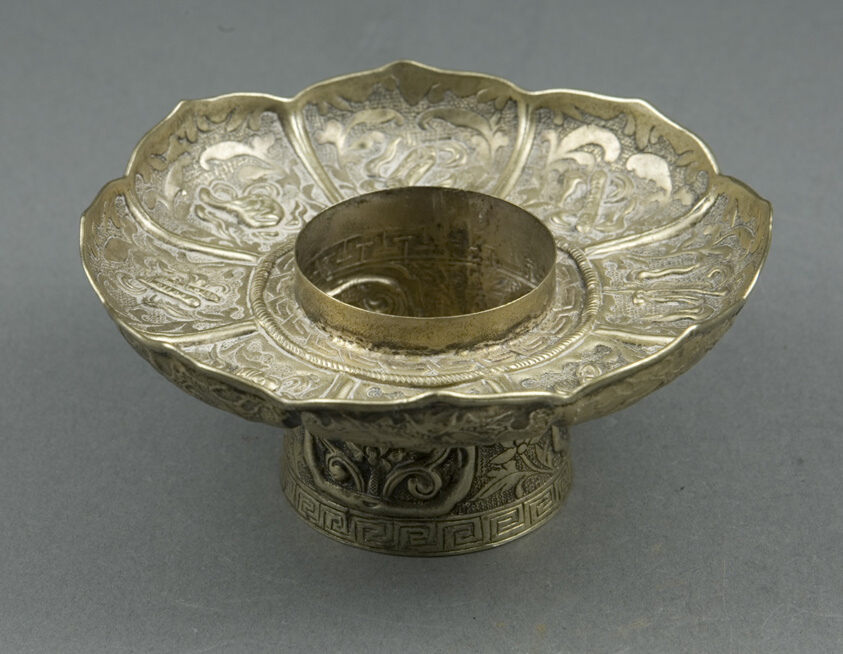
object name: Religious/Ritual Object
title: Lotus-Shaped Altar Bowl Stand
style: Himalayan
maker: Tibet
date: 18th century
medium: Silver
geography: Tibet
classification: ceremonial object; silver; metal; vessel; asian art; ritual objects